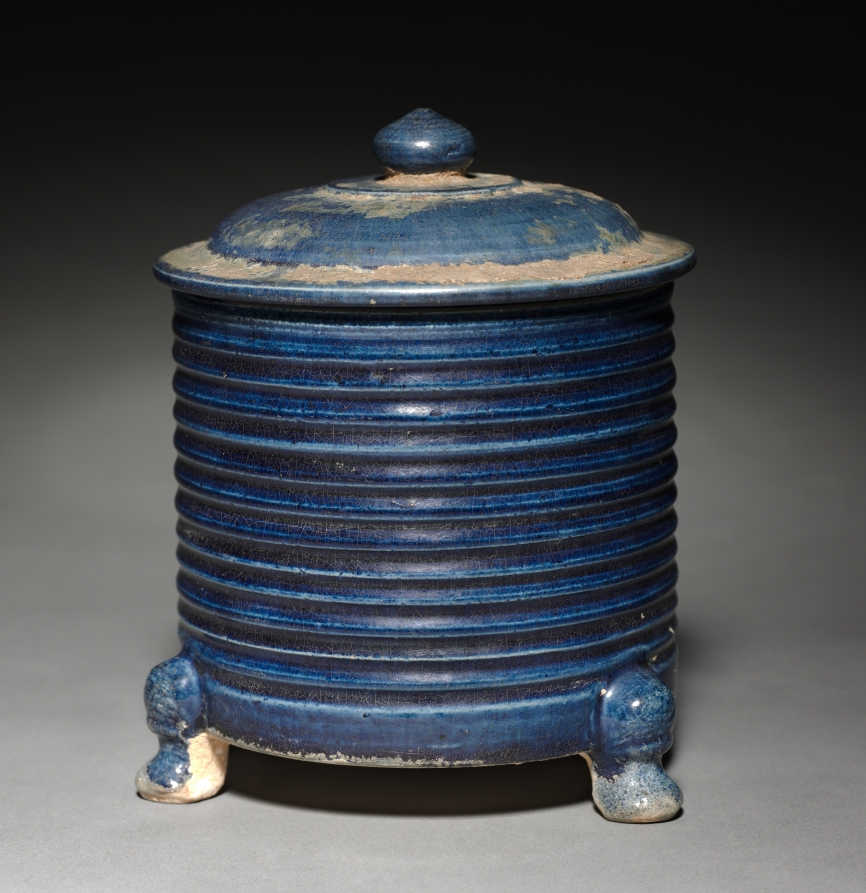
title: Covered Jar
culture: China, Tang dynasty (618–907)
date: early 700s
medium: glazed earthenware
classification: Ceramic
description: This covered cylindrical jar with three animal feet is lavishly covered with a cobalt blue glaze in the exterior and an amber glaze in the interior. Of the colored lead glazes of sancai (three-color) ware, blue was preeminent and precious. Imported cobalt from Persia (Iran, Afghanistan) was used as a glaze colorant that yields a rich, brilliant blue of considerable splendor.